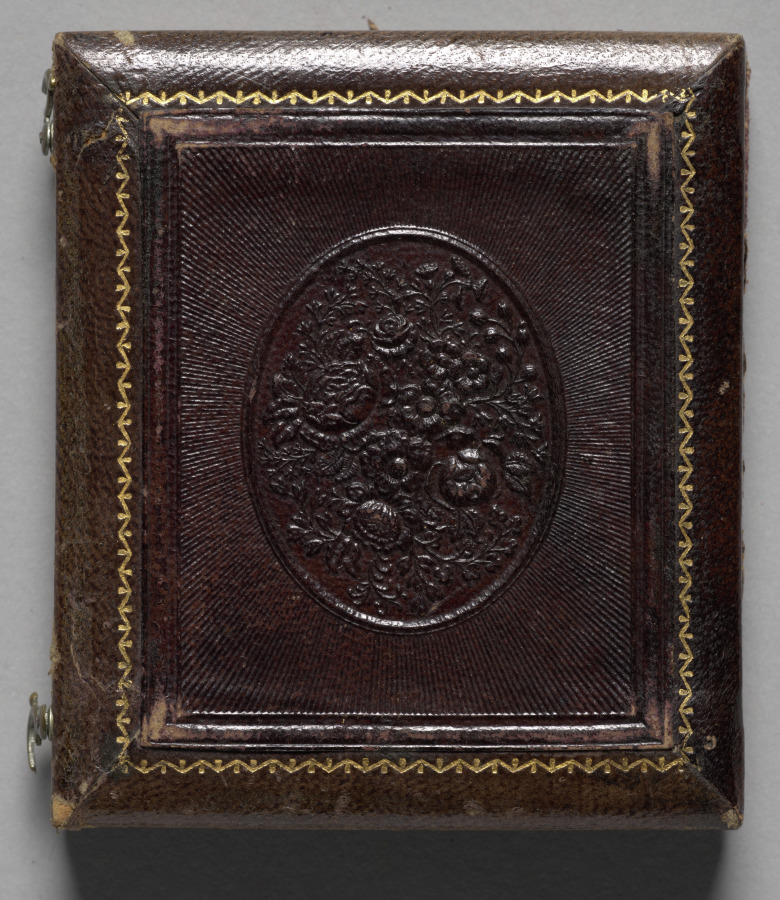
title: Hunter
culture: America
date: c. 1862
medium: daguerreotype, sixth plate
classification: Photograph